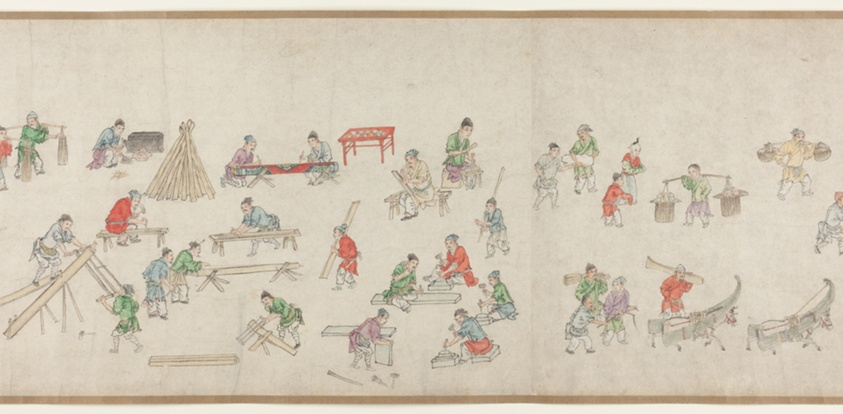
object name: Painting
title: Street Scenes in Times of Peace 太平風會圖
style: Chinese (culture or style)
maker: Zhu Yu (Zhu Junbi) 朱玉（朱君璧）; Chinese, 1293-1365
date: Yuan dynasty (1279–1368), 14th century 元朝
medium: Handscroll; ink and colors on paper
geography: China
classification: handscroll; painting; asian art